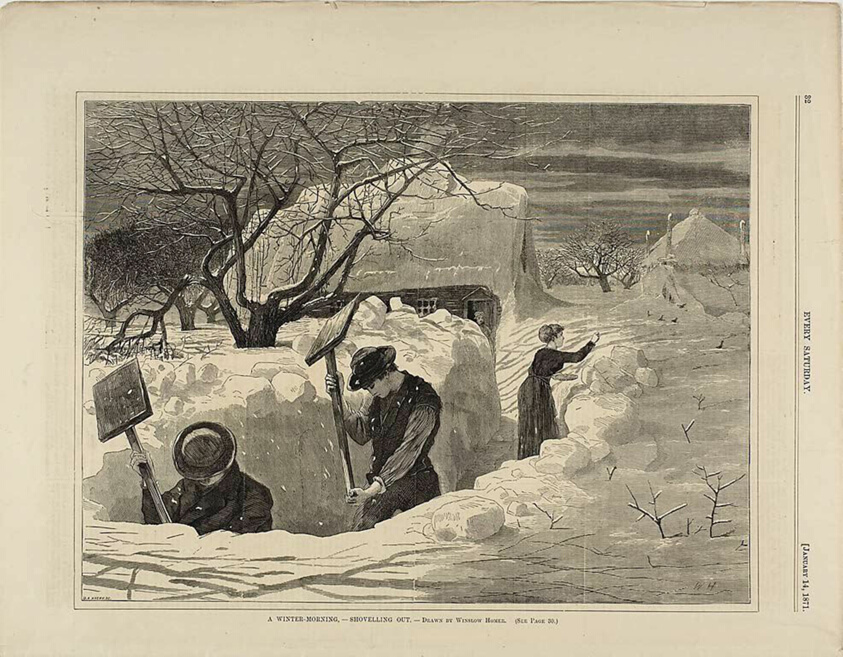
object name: Print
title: A Winter Morning Shovelling Out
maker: Winslow Homer (American, 1836-1910); published by Every Saturday (American, 1866-1874)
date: published January 14, 1871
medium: Wood engraving on paper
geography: United States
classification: wood engraving; print; prints and drawing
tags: winter